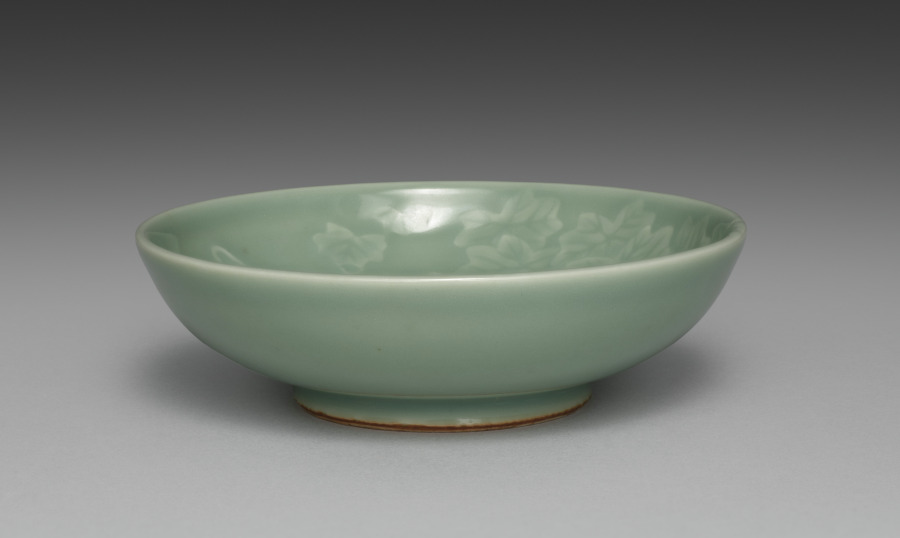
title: Dish from Dishes with Ivy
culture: Japan, Meiji period (1868–1912)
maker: Seifū Yohei III (Japanese, 1851–1914)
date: 1893–1914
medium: One from a set of five dishes; porcelain with green glaze and molded designs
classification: Ceramic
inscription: 清風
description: Yohei III’s main output for his sophisticated clientele was in the form of tea sets and dining sets. He often produced in pairs, sets of five, or sets of ten. This set of five dishes with a green glaze and designs of ivy vines in very low relief has unfortunately lost its box. These dishes are slightly larger than the other dishes, like CMA 2022.187, and so may have been not saucers but rather small plates for meals.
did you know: In his career, Seifū Yohei III created a range of dishes in green glazes.